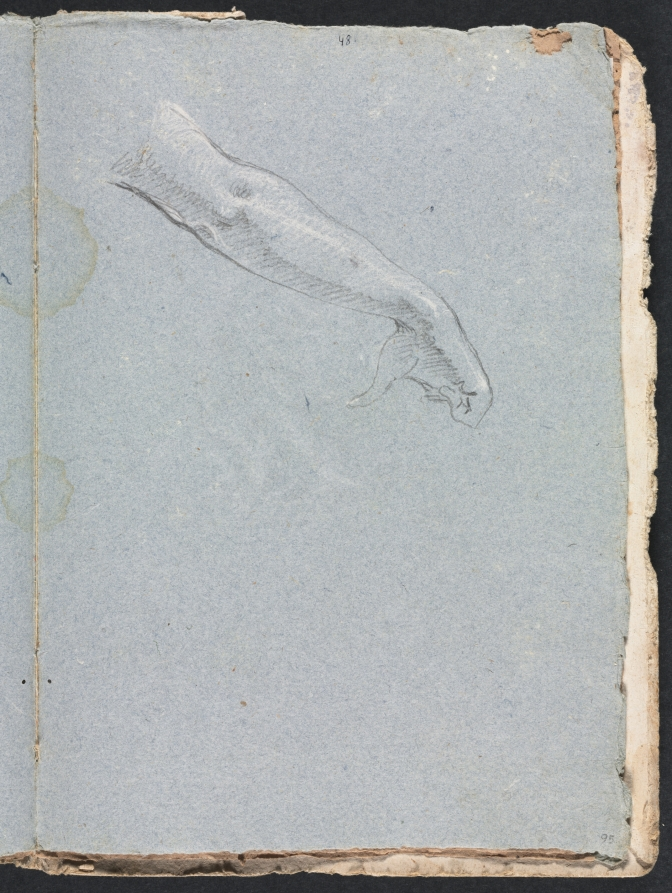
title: Verona Sketchbook: Right arm and hand (page 95)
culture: Italy, 18th century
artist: Francesco Lorenzi (Italian, 1723–1787)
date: 1760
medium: black chalk with white heightening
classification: Bound Volume